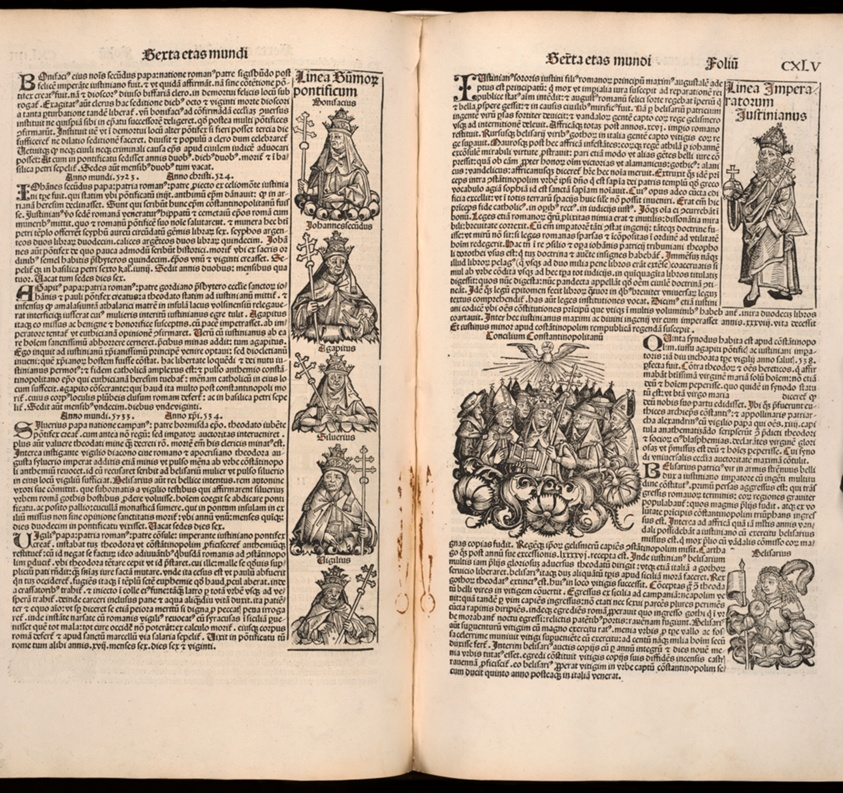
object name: Book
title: Nuremberg Chronicle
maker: Michael Wolgemut and Workshop; German, 1434-1519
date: 1493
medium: Woodcut and letterpress in black, with brush and watercolor, pen and ink on ivory laid paper, in modern full alum-tawed pigskin over wooden boards, sewn on raised bands, with blind tooled lines in frame pattern, blind tooling and hand-lettered title on the spine, and hand-sewn linen headbands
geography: Nuremberg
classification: book